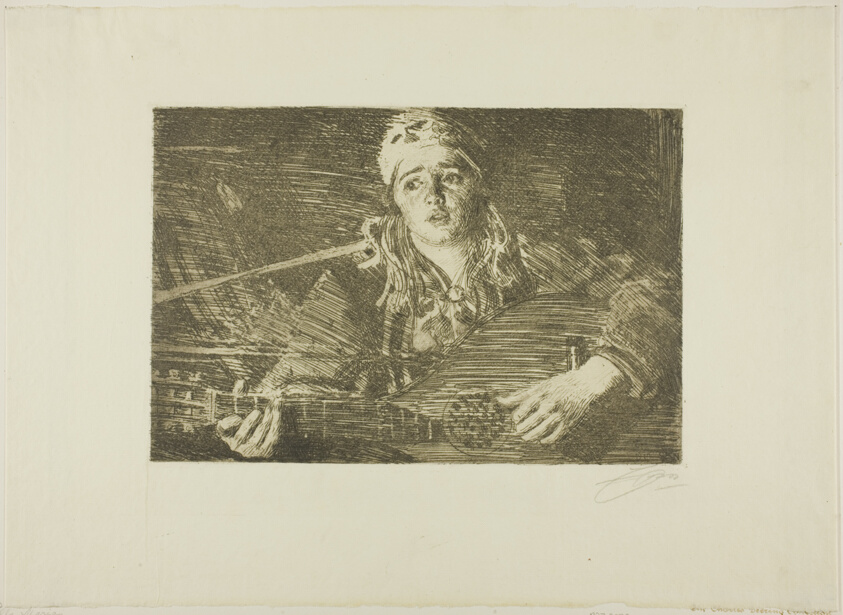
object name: Print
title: Ols Maria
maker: Anders Zorn (Swedish, 1860-1920)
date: 1919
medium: Etching on ivory laid paper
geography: Sweden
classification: etching; print; prints and drawing